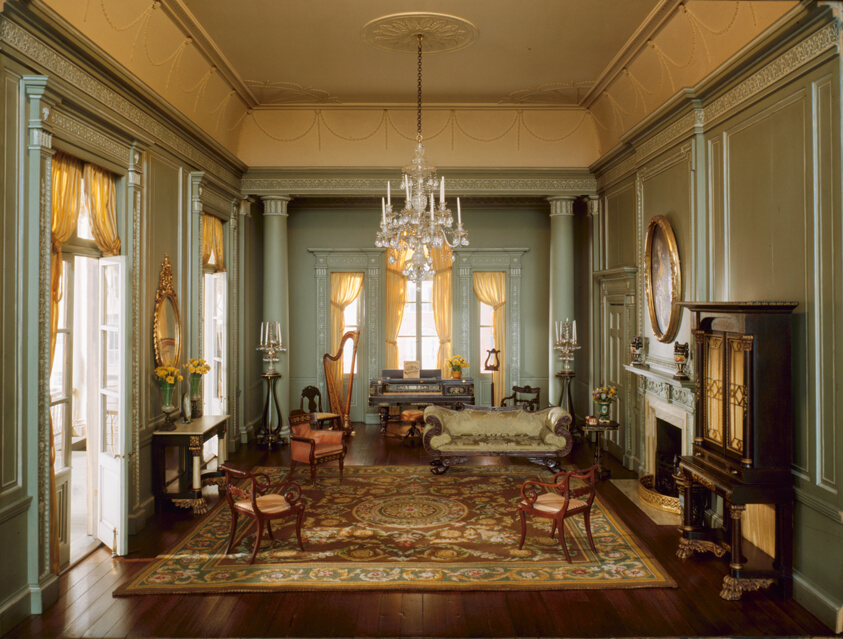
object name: Miniature room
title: A29: South Carolina Ballroom, 1775-1835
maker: Designed by Narcissa Niblack Thorne; American, 1882-1966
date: c. 1940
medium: Miniature room, mixed media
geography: United States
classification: miniature; thorne rooms